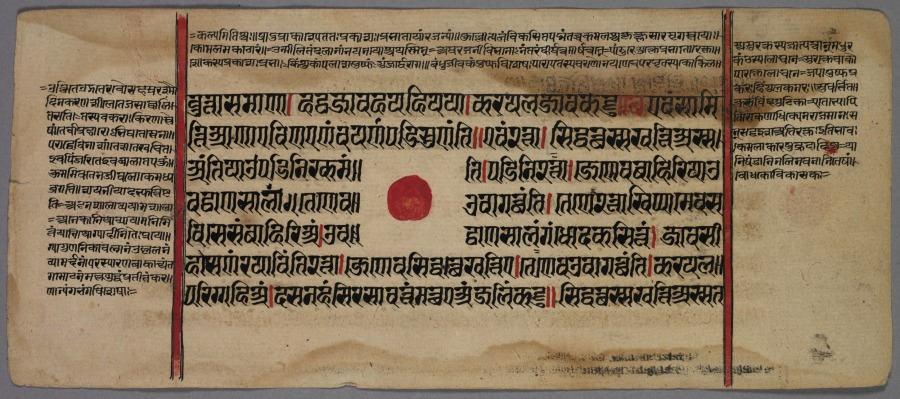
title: Leaf from a Jaina Manuscript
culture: India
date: 1400s–1500s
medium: ink on paper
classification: Manuscript